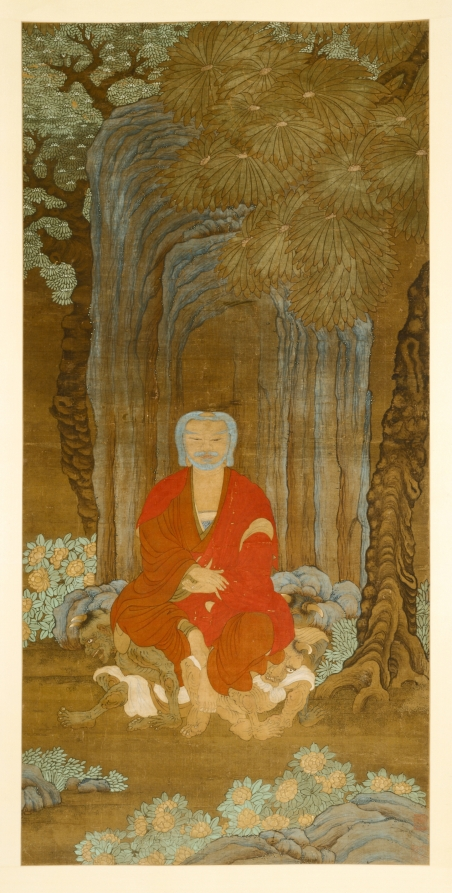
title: Shakyamuni under the Bodhi Tree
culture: China, Ming dynasty (1368–1644)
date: 1600–1650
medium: hanging scroll; ink and color on silk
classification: Painting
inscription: Artist's seal(?): Ta-fang-chih. 1 additional seal of Chiao Ping (dates unknown)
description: The historical Buddha Shakyamuni is seated in meditative posture upon the backs of three demons under the bodhi tree, where he achieved enlightenment. All three demons have horns like devils, and two have green skin. While they accommodate the Buddha, his weight seems to keep them under control. Since the Buddha’s hands do not conform to any accepted gesture, the specific religious event portrayed is unclear.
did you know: The blue-green style and grotesque goblins suggest an otherworldly sphere.